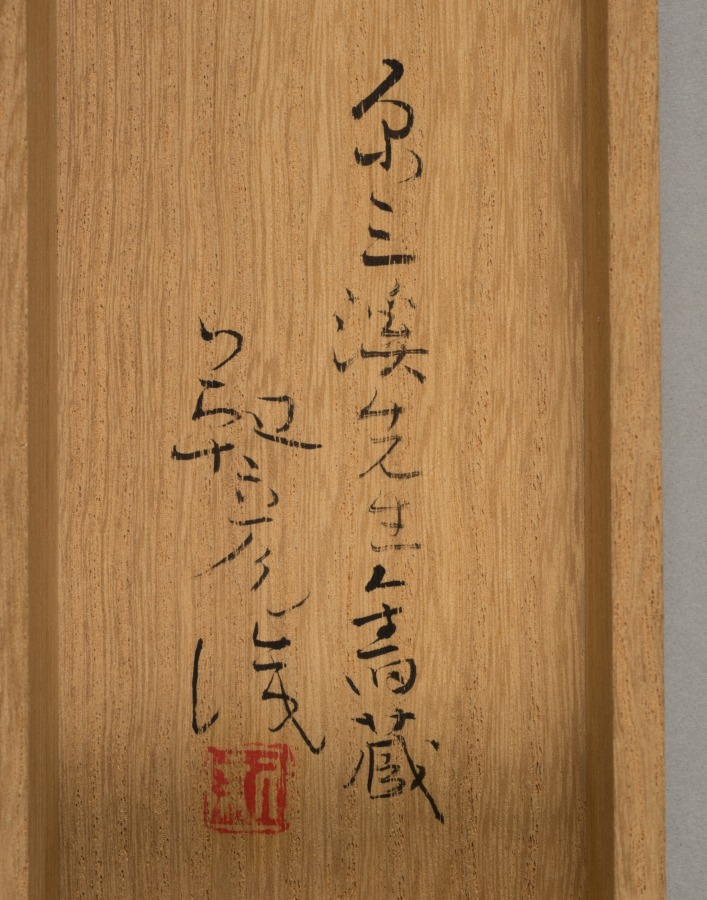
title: Two Beauties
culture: Japan, Edo period (1615–1868)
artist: Kitao Shigemasa (Japanese, 1739–1819)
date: late 1700s–early 1800s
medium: hanging scroll, pillar painting: ink and color on silk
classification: Painting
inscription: Artist's signature and seal, lower right corner. Poem inscribed on upper section of scroll.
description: Shigemasa favored using colors in broad opaque masses, as seen here in the beauties’ robes. He was a painter, printmaker, and poet, specializing in courtesan and actor prints. The format of this hanging scroll or "pillar painting" allows for the work to be hung on a pillar in a Japanese home.